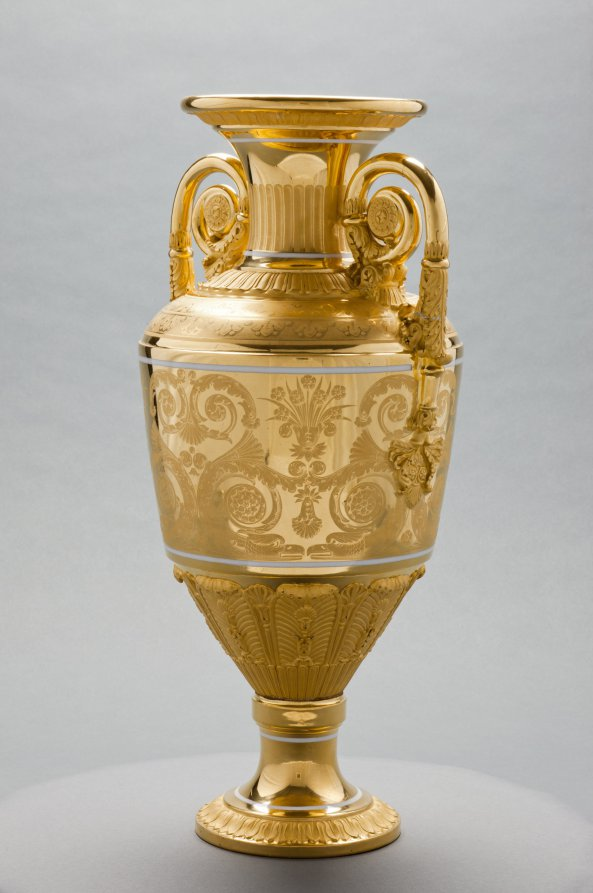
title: Vase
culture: Russia, St. Petersburg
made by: St. Petersburg Imperial Porcelain Factory (Russian)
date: c. 1820–1830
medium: gilt porcelain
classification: Ceramic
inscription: inscribed: "Moreau" in gold near lip.